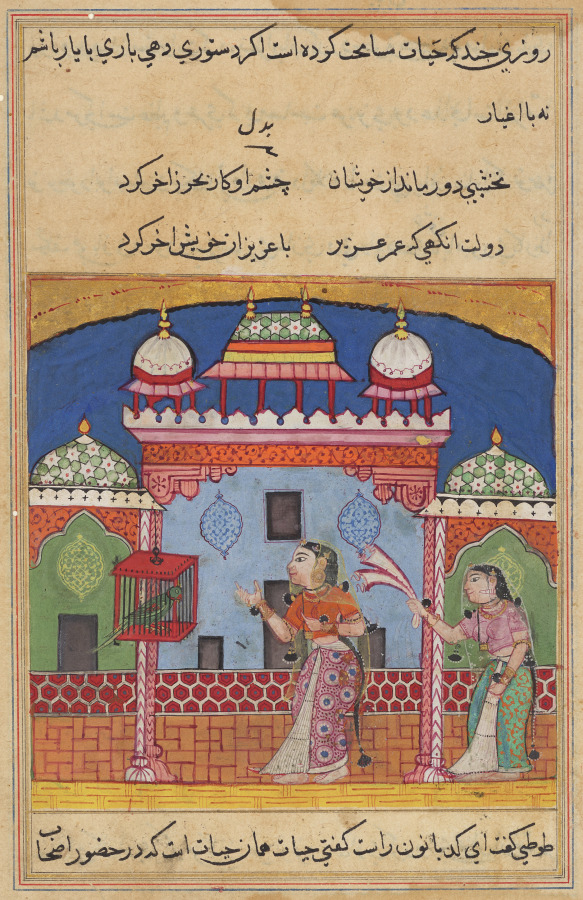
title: The Parrot Addresses Khujasta at the Beginning of the Twenty-second Night, from a Tuti-nama (Tales of a Parrot)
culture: Mughal India, court of Akbar (reigned 1556–1605)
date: c. 1560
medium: gum tempera, ink, and gold on paper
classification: Painting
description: On the 22nd night after her husband’s departure, the parrot advises his mistress Kujastha that when she meets her lover that night she should use her best judgment and manners and not allow herself to be laughed at like the wife of the amir, a local ruler. When Khujasta asked about what happened to her, the parrot related a story about the amir, his jester, and their unfaithful wives. This artist continued to use flat planes of colors and patterns characteristic of Indian painting before the Mughals. Experimentation with techniques to indicate depth and spatial recession––a new trend early in the reign of Akbar––can be seen in the tilted planes of the birdcage and the shading at the edges of the doorways.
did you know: The parrot’s story is set in Kerman, a province of southeast Iran.